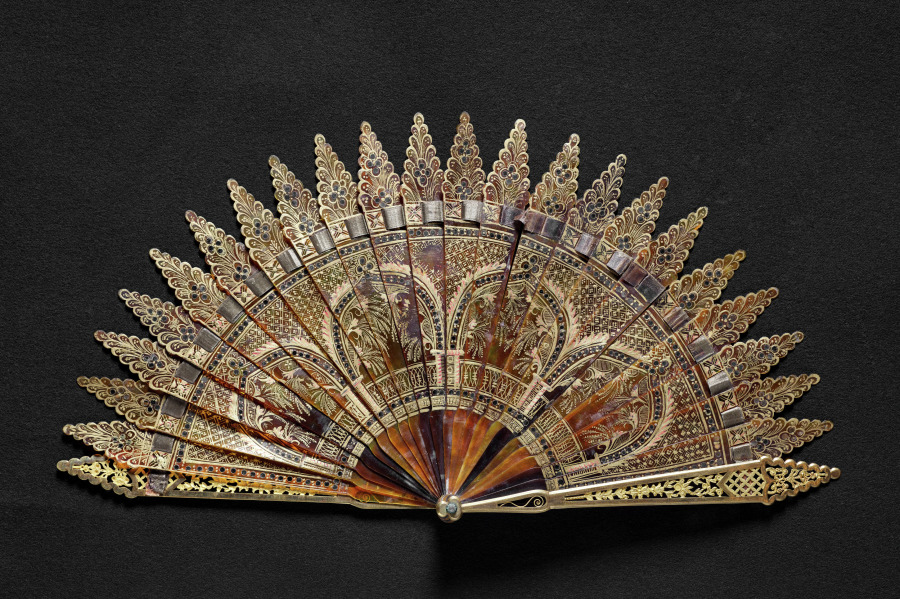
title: Fan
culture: France, 18th-19th century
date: 1700s - 1800s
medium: tortoise shell with pierced gilt metal for outer sticks, elaborate gilt decoration and spangles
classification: Miscellaneous